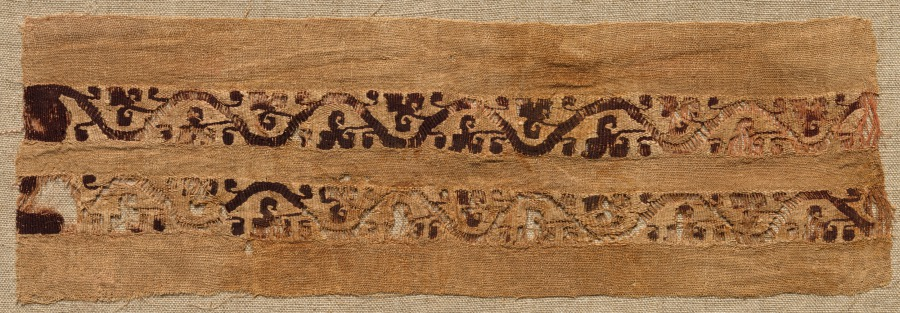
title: Fragment, with Sleeve Band, from a Tunic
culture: Egypt, Byzantine period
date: 300s–500s CE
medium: linen ground, linen and wool tapestry ornament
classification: Textile